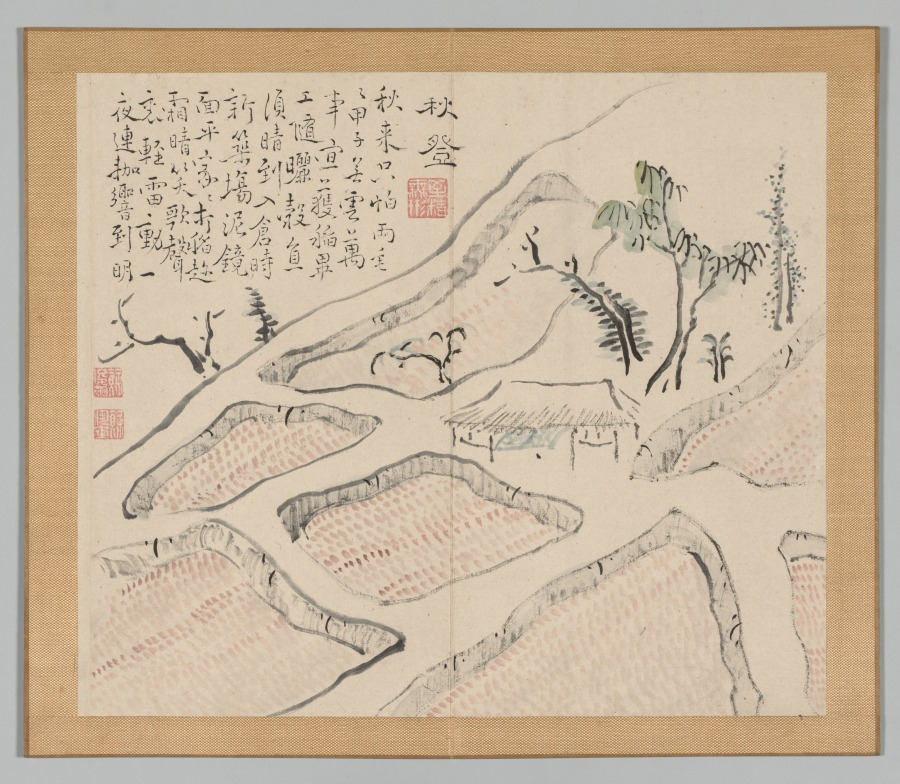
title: Reverberations of Taiga, Volume 2 (leaf 35)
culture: Japan, Edo period (1615–1868)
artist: Aoki Shukuya (Japanese, d. 1802)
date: mid- to late 1700s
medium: double-leaf from pair of albums; ink and light color on paper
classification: Portfolio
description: Traditionally, young painters in Japan began their studies with an established master-painter. The master's compositions invariably became models that the apprentice copied to learn various ink and brush techniques. Shukuya was a pupil of the famous Kyoto artist Ikeno Taiga, whose style is reflected in these sketches of rocks, trees, and mountains.